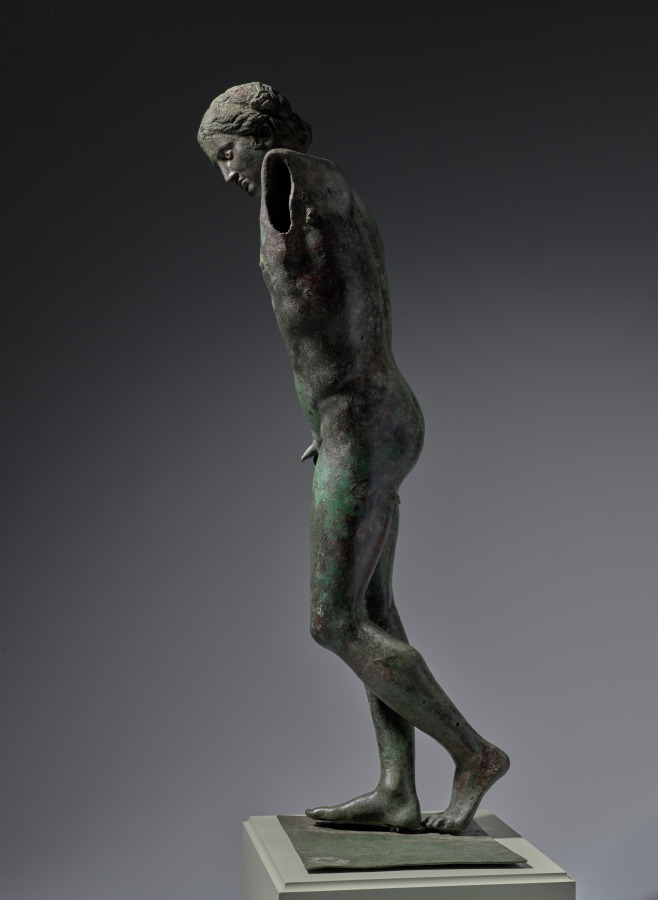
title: The Cleveland Apollo: Apollo Sauroktonos (Lizard-Slayer) or Apollo the Python-Slayer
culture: Greece, Athens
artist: attributed to Praxiteles (Greek, Athenian, c. 400–330 BCE)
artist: or Follower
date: c. 350–200 BCE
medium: bronze, copper, and stone inlay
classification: Sculpture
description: The Cleveland Apollo has been called both Lizard-Slayer (Sauroktonos) and Python-Slayer. The first name comes from the Roman author Pliny the Elder (23–79 CE), who noted in describing bronze works made by the Athenian sculptor Praxiteles (active around 370–330 BCE), “the youthful Apollo [is] known as the Sauroktonos because he is aiming an arrow at a lizard [Greek sauros] which is stealing toward him.” Scholars have long connected this description with artworks showing the young Greek god Apollo in a distinctive pose and hairstyle, standing on his right leg and leaning to his left. In more completely preserved versions, Apollo reaches toward a tree with his left arm and seems to take aim at a lizard. The Cleveland Apollo shows the adolescent god similarly posed and coiffed, making it an important addition to the Apollo Sauroktonos group—the only surviving large-scale bronze sculpture of the type. The young Greek god Apollo, identifiable by his distinctive hairstyle and pose, stands on his right leg and leans to his left, probably toward a now-lost tree. Although now separated, the left forearm and hand survive, together with an unusual lizard-like creature, perhaps drawn from the world of myth. A flat bronze base also remains, though it may be a later adaptation. A tree or other support has been lost, probably smaller than in the marble versions. Given its material and very high artistic quality—note the lifelike hair, fingernails, and inlaid copper lips and nipples—more than one scholar has suggested that the Cleveland Apollo could be the very sculpture seen by Pliny. Some have called the sculpture “Python-Slayer,” seeing the oddly shaped serpentine creature with asymmetrical legs as the mythical Python killed by Apollo in establishing his sanctuary at Delphi. But technical details may explain some of the asymmetry, and no other specific evidence connects it to Delphi. Most scholars would retain the name Sauroktonos (Lizard-Slayer) for the Cleveland Apollo, even as some debate whether it was made by Praxiteles himself or a later follower.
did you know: The Cleveland Apollo is the only surviving large-scale bronze sculpture of its type, Apollo Sauroktonos (the Lizard-Slayer).